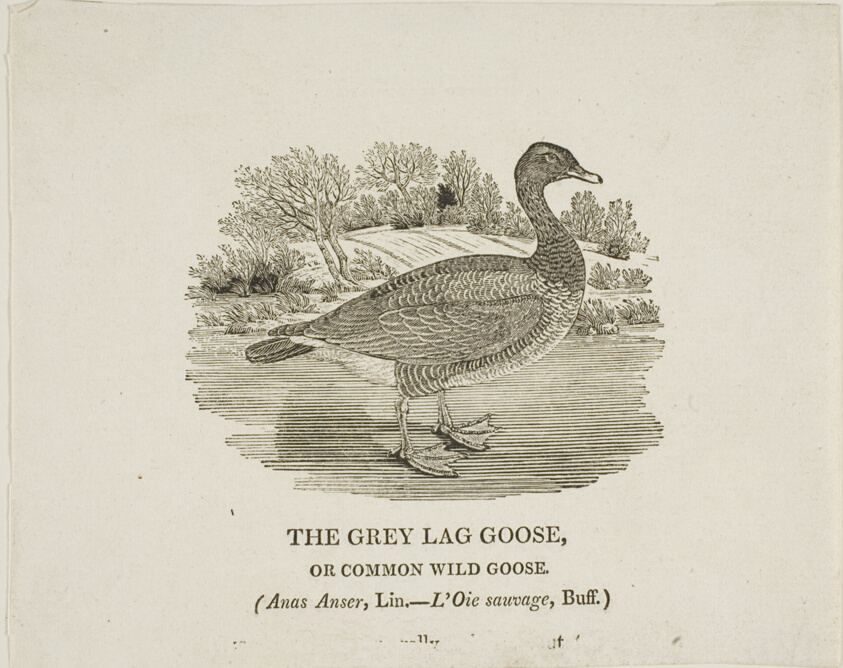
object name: Print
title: Grey Lag Goose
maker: Thomas Bewick (English, 1753-1828)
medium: Woodcut on ivory wove paper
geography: England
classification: relief etching; print; prints and drawing